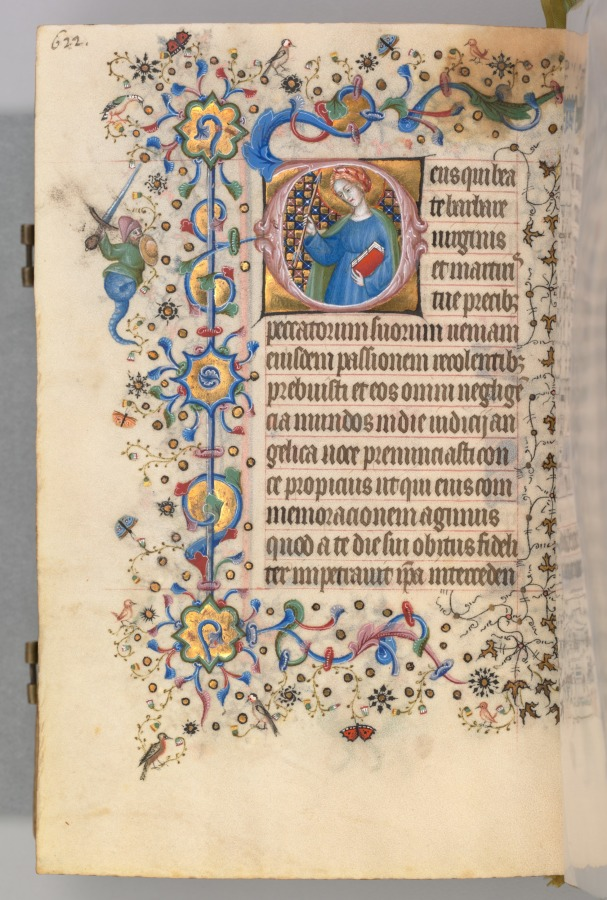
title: Hours of Charles the Noble, King of Navarre (1361-1425): fol. 305v, St. Martha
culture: France, Paris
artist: Master of the Brussels Initials and Associates (French)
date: c. 1405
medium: ink, tempera, and gold on vellum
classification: Bound Volume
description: This precious volume was obviously highly prized by its owner, the French-born King of Navarre, who had his coat of arms painted on no less than twenty folios. Rather than directly commissioning this manuscript from a specific workshop, it seems that Charles the Noble acquired his book of hours -- perhaps ready-made for the luxury market -- while on a trip to Paris in 1404-05. A collaborative effort, six painting styles are evidenced within the pages of this codex, those of two Italians, two Frenchmen, and two Netherlanders. The painter who was responsible for the planning and decoration of the book, and who produced seventeen of the large miniatures, was a Bolognese artist known as the Master of the Brussels Initials. His principal assistant, responsible for most of the borders, was a Florentine who signed his name "Zecho" da Firenze on folio 208 verso.